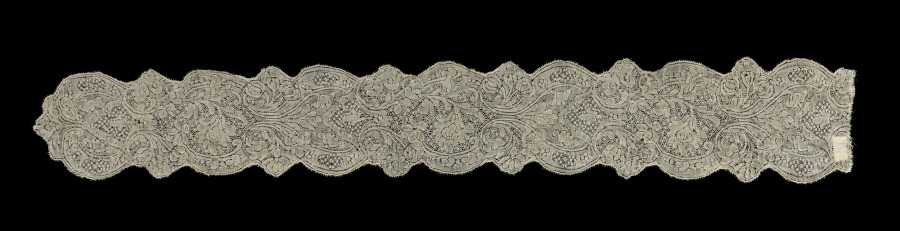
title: Lace Lappet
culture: Belgium, Binche ?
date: 1730s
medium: Linen: bobbin lace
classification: Lace